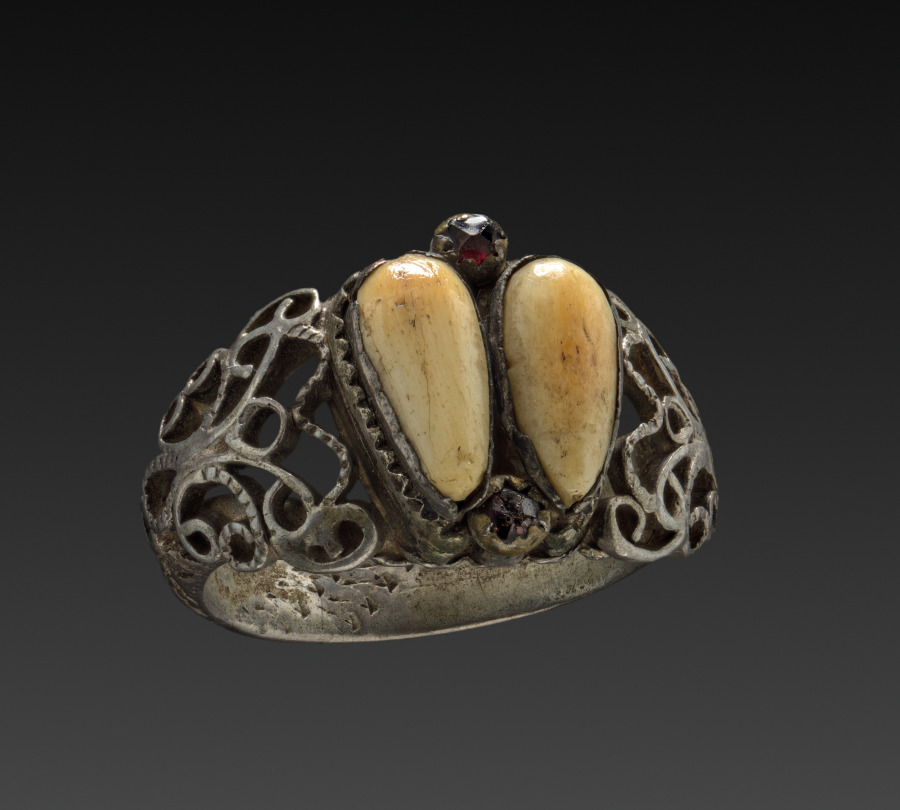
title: Peasant's Ring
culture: Germany, Bavaria, 18th century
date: 1700s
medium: silver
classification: Jewelry